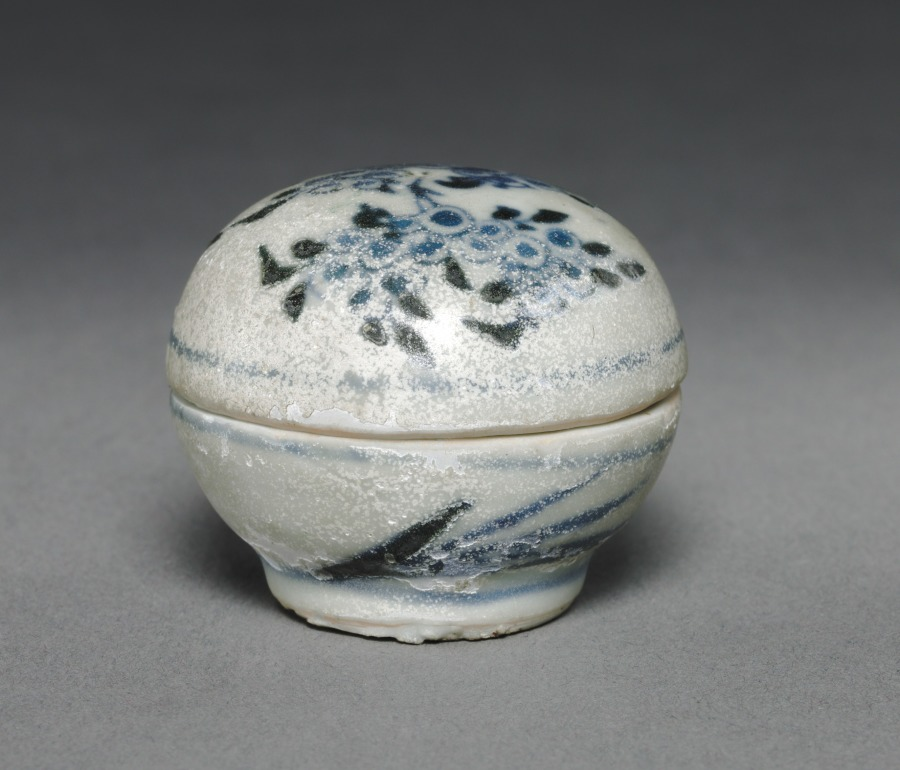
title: Pill Box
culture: China, Qing dynasty (1644-1911)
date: c. 1752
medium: porcelain with blue and white decoration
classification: Ceramic